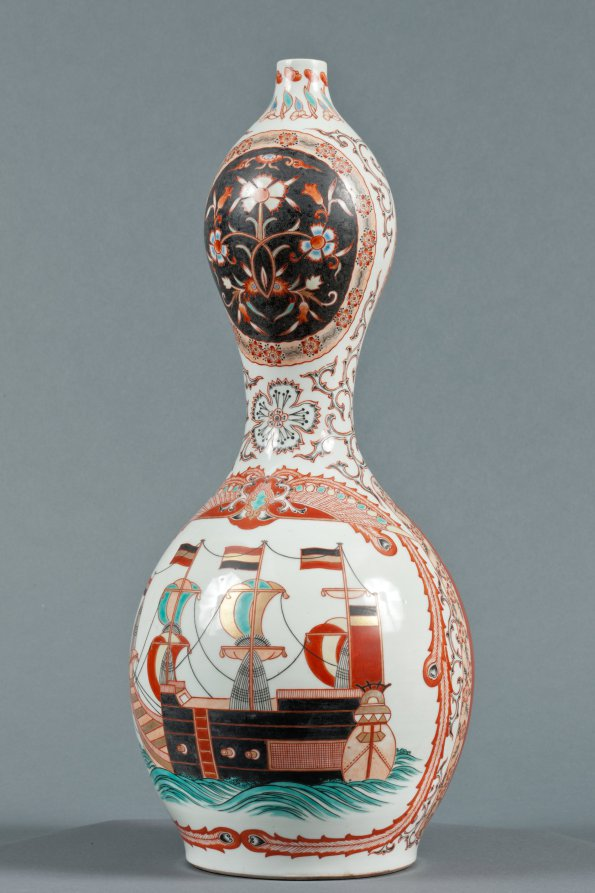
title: Bottle with Western Ships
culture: Japan, Edo period (1615–1868)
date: c. 1800–1868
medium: Porcelain with decoration in colored enamels and underglaze blue, overglaze enamels, and gold (Hizen ware, Arita type)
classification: Ceramic